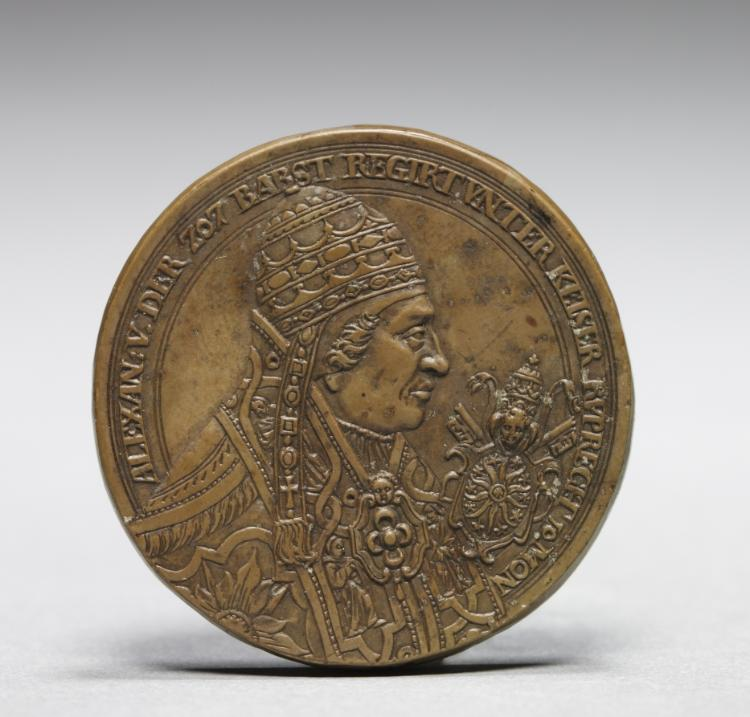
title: Portrait of Antipope Alexander V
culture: Germany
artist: Tobias Wolff (German, 1606)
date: c. 1574–1576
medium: Kelheim stone (fine-grained limestone)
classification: Sculpture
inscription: inscription: ALEX: V. DER 207 BABST REGIRT UNTER KEISER RUPRECHT 10 MON (Alexander V the 207th Pope reigned in the time of Emperor Ruprecht for 10 months.)